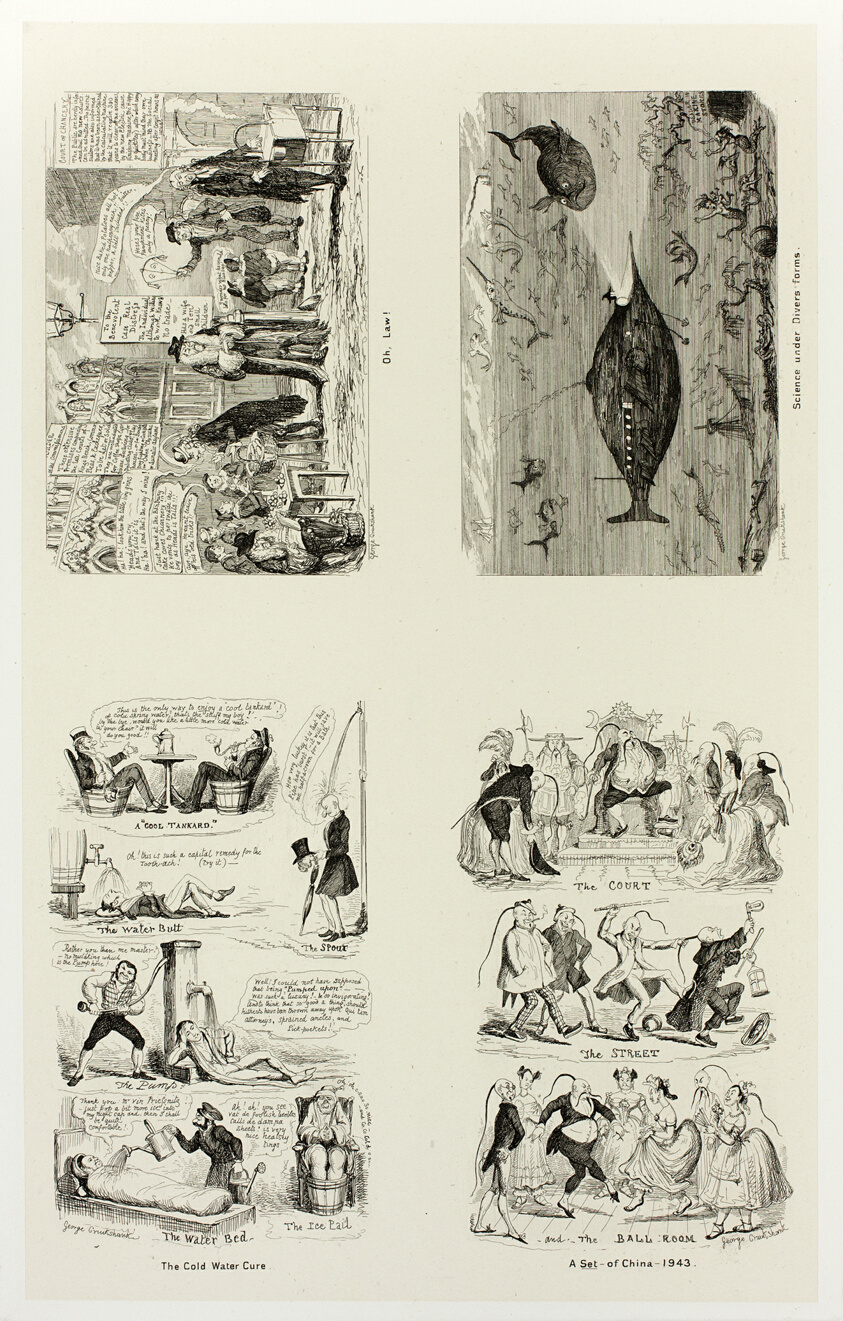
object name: Print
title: Oh, Law! from George Cruikshank's Steel Etchings to The Comic Almanacks: 1835-1853 (top left)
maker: George Cruikshank (English, 1792-1878); published by Pickering & Chatto (English, 19th century)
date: 1843, printed c. 1880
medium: Four steel etchings in black on cream India paper, laid down on off-white card (chine collé)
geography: England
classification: etching; paper; print; prints and drawing